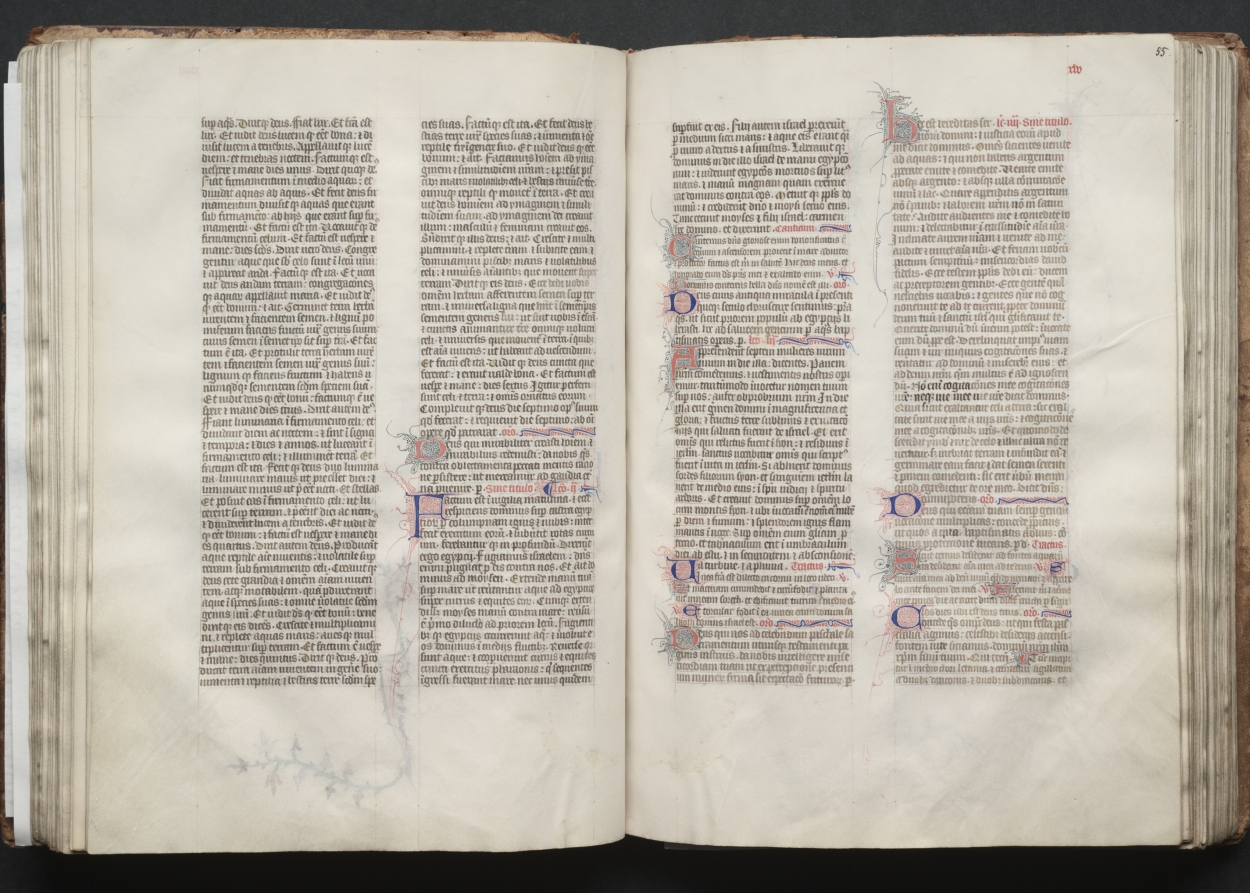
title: The Gotha Missal: Fol. 54v, Text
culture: France, Paris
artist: Master of the Boqueteaux (French)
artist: and Workshop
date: c. 1375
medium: ink, tempera, and gold on vellum; blind-tooled leather binding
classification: Bound Volume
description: The style and quality of this manuscript's decoration is typical of deluxe Parisian books made for aristocratic or royal patrons. Most of the book's decoration appears to be the work of the Master of the Boqueteaux, an artist active at the court of King Charles V (died 1380). His style was apparently shared by a number of book illuminators working in and around Paris. It is very possible that the Gotha Missal belonged to Charles V, but is not provable because the manuscript has no royal portraits and lacks a colophon. Given the book's magnificent decoration, however, it would seem that it was produced for a Valois prince, if not for the king himself. The manuscript receives its name from the German dukes of Gotha, its later owners.